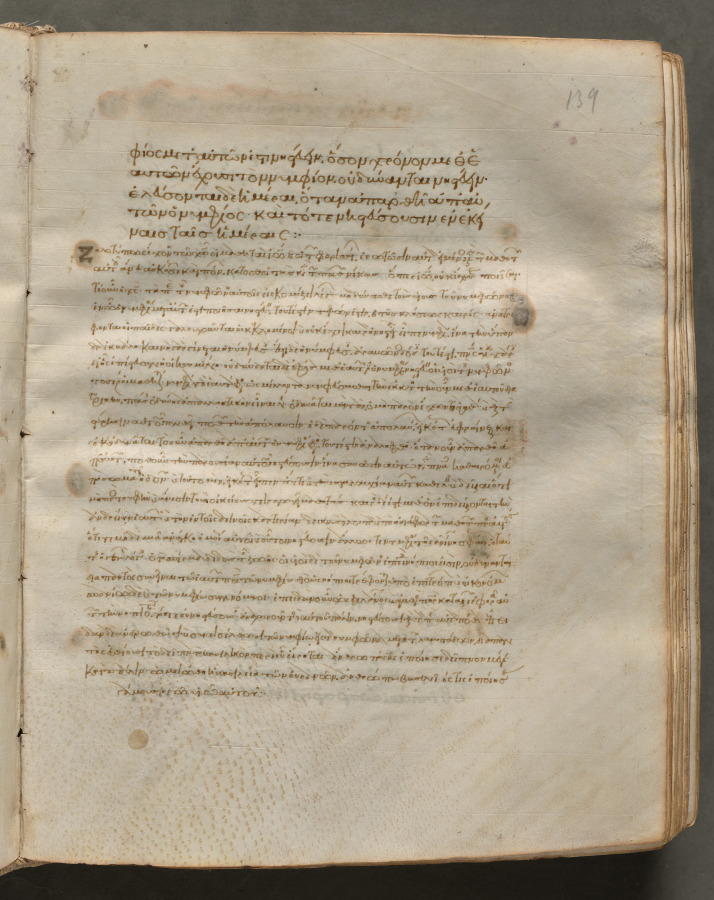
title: Text, folio 139 (recto), from a Gospel Book with Commentaries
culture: Byzantium, Constantinople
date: c. 1000–1100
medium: ink, tempera, and gold on vellum; leather binding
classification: Bound Volume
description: Each of the four gospels in this book opens on a page with brilliantly illuminated borders depicting the author of the text as well as birds-principally peacocks, symbols of the immortality of the soul-and fountains, representing the fountain of life and the salvation of the soul. This volume consists of 428 leaves with texts in Greek. Its level of sophistication suggests that it was probably written and decorated in a monastery in Constantinople.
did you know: Gospel Books were carried in procession through Byzantine churches.